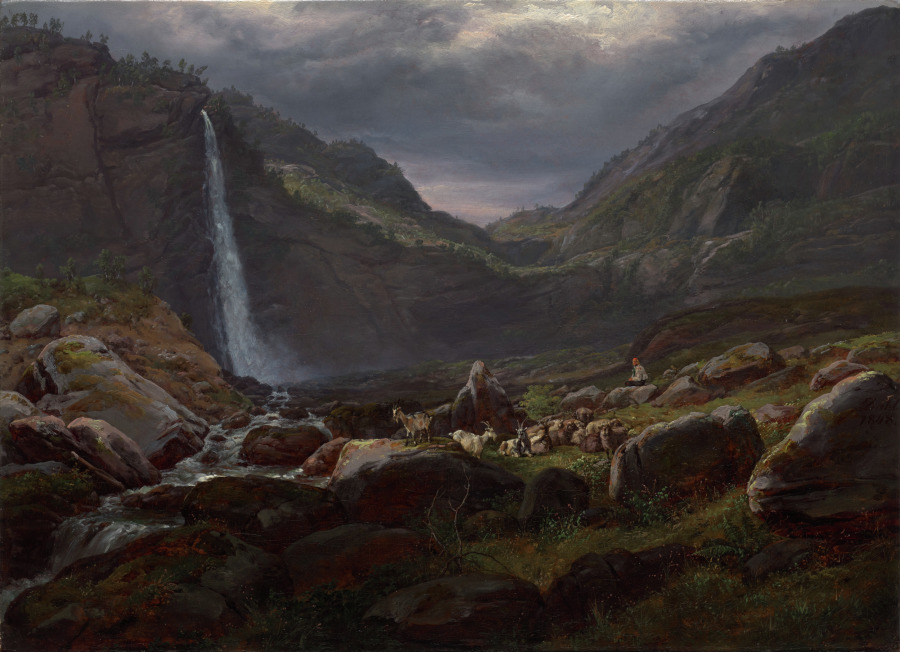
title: Feige Waterfall (Feigefossen), Lysterfjord, Norway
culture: Norway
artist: Johan Christian Clausen Dahl (Norwegian, 1788–1857)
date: 1848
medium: Oil on canvas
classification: Painting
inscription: Signed and dated lower right: "Dahl / 1848"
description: Johan Christian Dahl painted this dramatic view of the Feige Waterfall at Lysterfjord, one of the most spectacular natural wonders in his homeland, at time a when Norwegians were trying to foster awareness of their identity as a distinct national culture. Dahl’s views of Norway played a crucial role in establishing his reputation as the leading Norwegian artist of the period and one of most important landscape painters of the Romantic era.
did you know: Set against a magnificent mountain cliff, the waterfall empties into a broad fjord that stretches nearly 70 miles before reaching the ocean just north of Dahl’s hometown of Bergen.